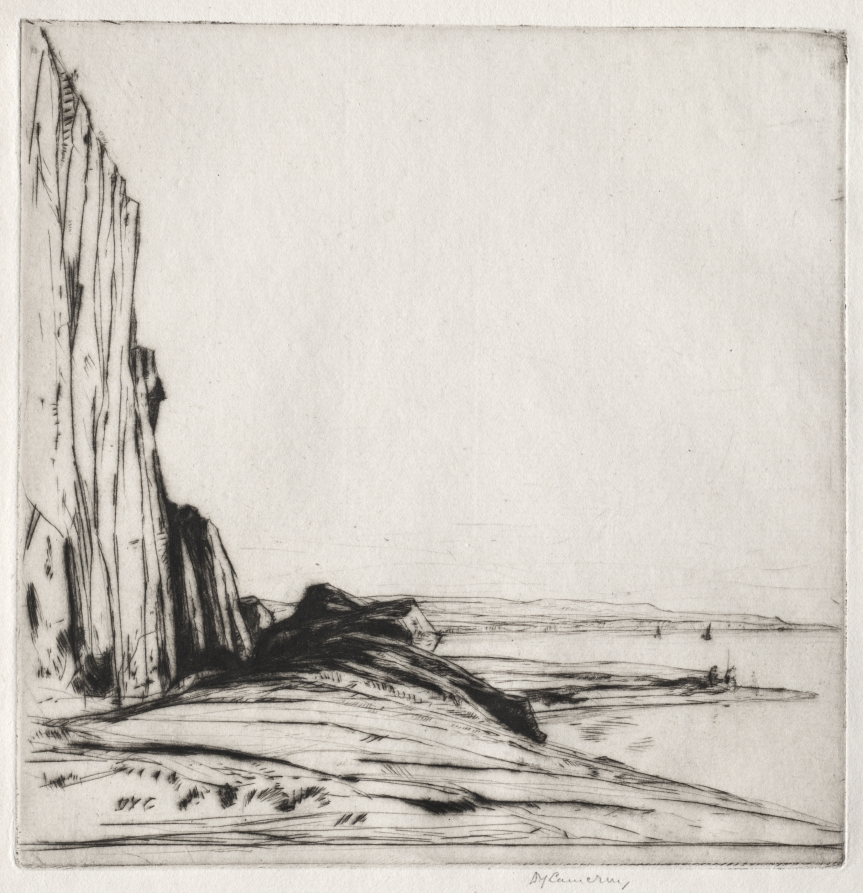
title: Appin Rocks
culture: England, 20th century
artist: David Young Cameron (British, 1865–1945)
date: 1913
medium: drypoint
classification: Print